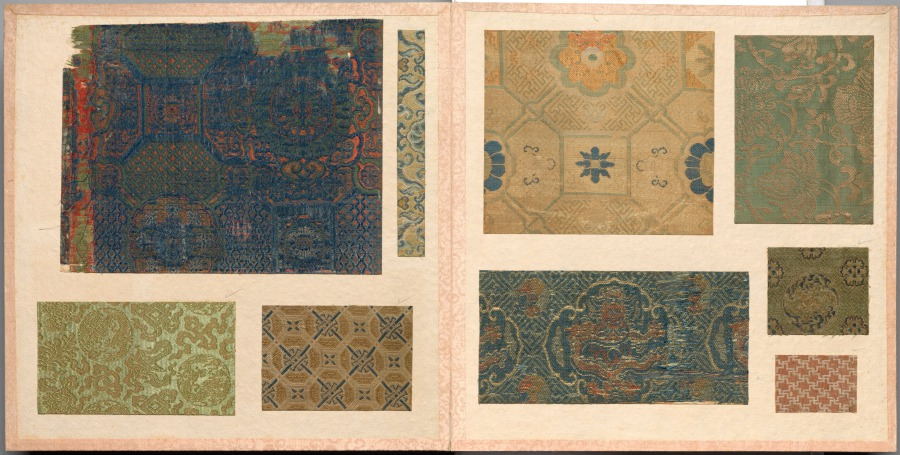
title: Album of Textile Samples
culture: Japan and China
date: 1700s–1800s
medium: silk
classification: Textile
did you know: This album contains 46 pages with 156 mounted Chinese or Japanese textile samples.